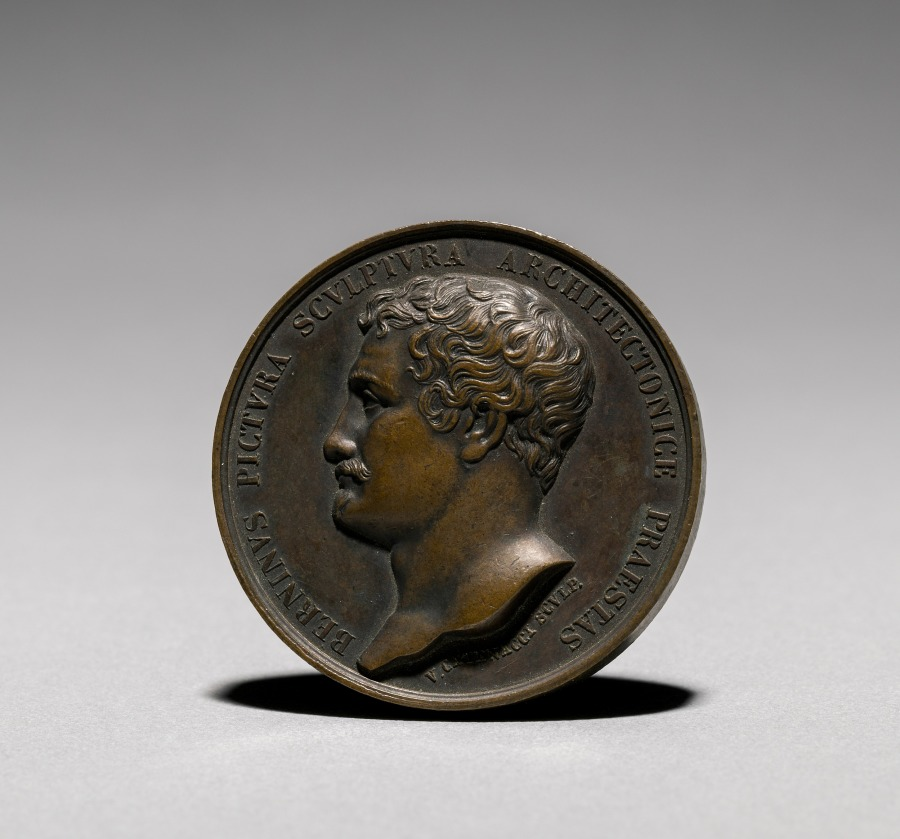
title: Medal Depicting Gian Lorenzo Bernini (1598-1680) from the Illustrious Men of the Kingdom of the Two Sicilies (obverse)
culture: 20th century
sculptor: V. Catenacci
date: 1830–34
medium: bronze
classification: Metalwork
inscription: On the obverse: BERNINVS PICTVRA SCVLPTVRA ACHITECTO. NICE PRAESTAS Bust of Bernini facing left. Below: V. CATENACCI SCVLP.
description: Gian Lorenzo Bernini was an Italian sculptor, urban planner, architect, painter, set designer, and playwright during the Renaissance. He designed many churches, monuments, and the canopy over the high altar at St. Peter's Basilica in Rome.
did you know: Naples was a center of medal and coinage minting for several centuries in the Kingdom of the Two Sicilies.